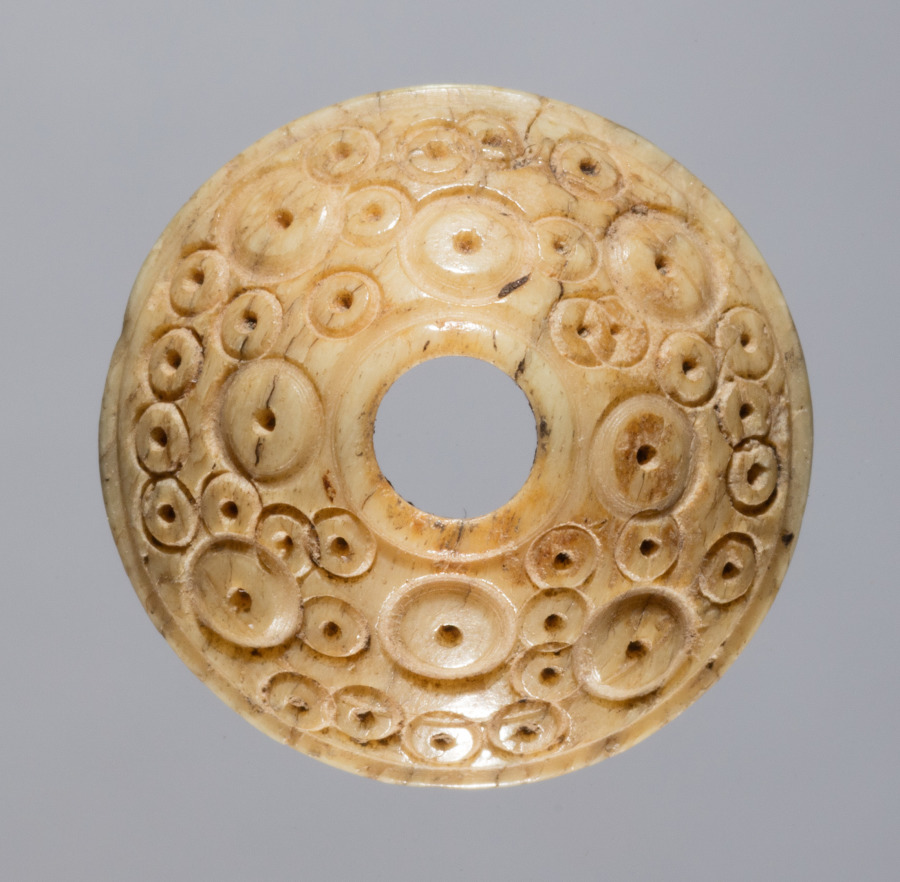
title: Spindle Whorl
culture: Iran, early Islamic period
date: 700s - 900s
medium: bone, incised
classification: Spindle Whorl